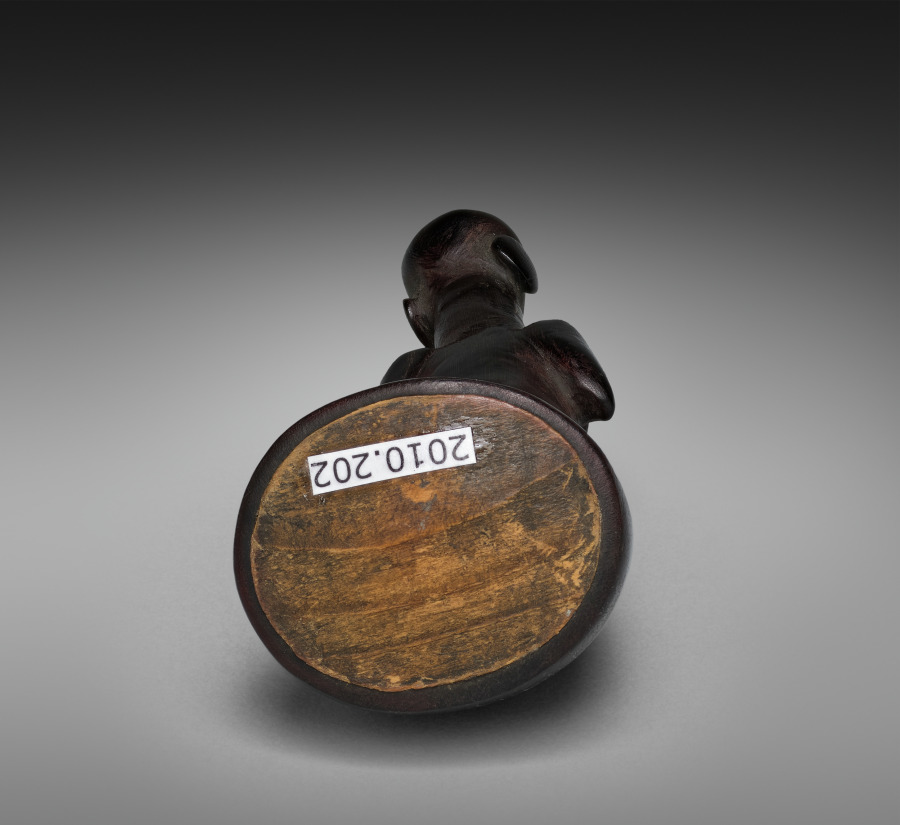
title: Snuff Container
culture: Africa, Southern Africa, Lesotho, South Sotho maker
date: 1800s-1900s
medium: Horn and wood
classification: Vessels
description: This snuff container in the form of a human (female) figure was carved from cattle horn. The form of the image follows the curve of the horn, with arms and hands held to the chest. Despite its smallish size and minimalist execution, this object demonstrates considerable expressive power. Cattle had special meaning for the pastoralist peoples of southern Africa in that it stood for the wealth and status of the individual and the group. However, similar to the ideas associated with tobacco and snuff, cattle also referred to the world of the ancestors. Snuff containers like this one had great significance for their owners and users.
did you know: The tobacco product snuff was stored in decorative, yet useful, containers like this one.